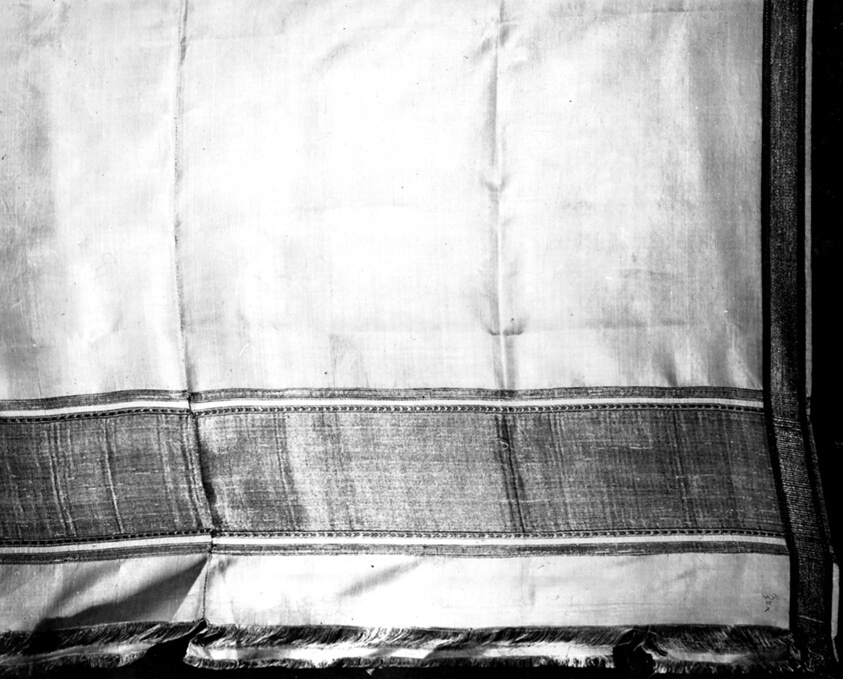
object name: Costume and Accessories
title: Sash or Sarong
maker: Indonesia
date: 19th century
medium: Plain cloth with borders of compound twill and cloth; yellow silk with woven silver and red silk borders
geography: Indonesia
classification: textile; costume; needlework (visual works); dress (garment); clothing